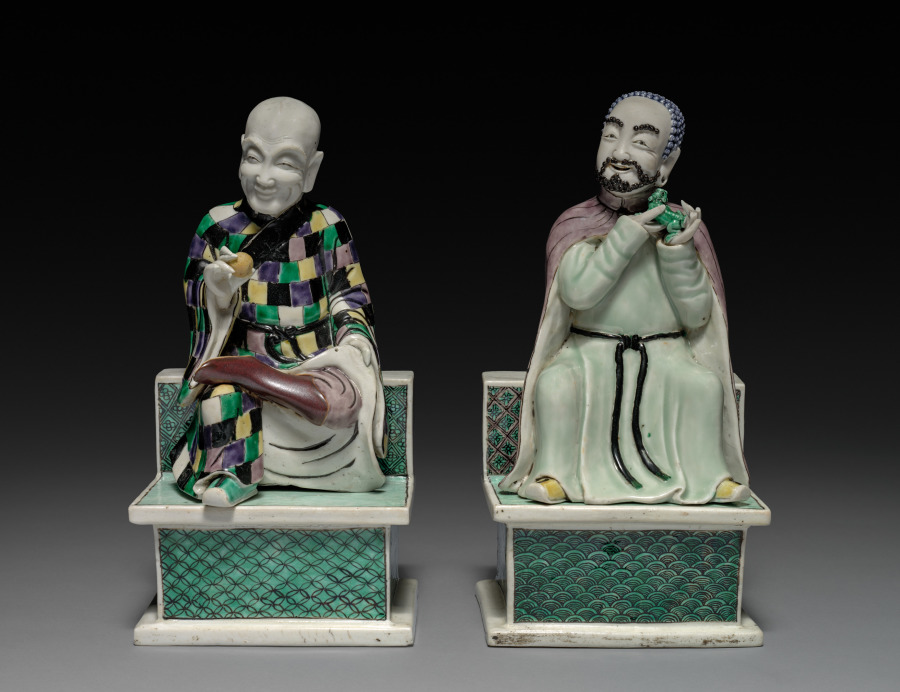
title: Lohan (Arhat) Holding a Peach; Lohan (Arhat) Holding a Fu Dog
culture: China, Jiangxi province, Jingdezhen kilns, Qing dynasty (1644–1911), Kangxi reign (1662–1722)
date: 1662–1722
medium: porcelain with famille verte overglaze enamel decoration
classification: Ceramic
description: Lohan are disciples of Buddha with supernatural powers and eccentric behaviors. One lohan is holding the peach of longevity (shoutao), the other is holding the fu-dog, symbolizing good luck. With carefree smiles and playful gestures, these two figures embody a humorous attitude and a detachment from worldly affairs. This pair of porcelain figures was perhaps part of a house altar set or a decorative item in a household.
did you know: During the 1600s, porcelain sculptures decorated in famille verte overglaze enamel colors were produced for the domestic as well as export market to Europe.